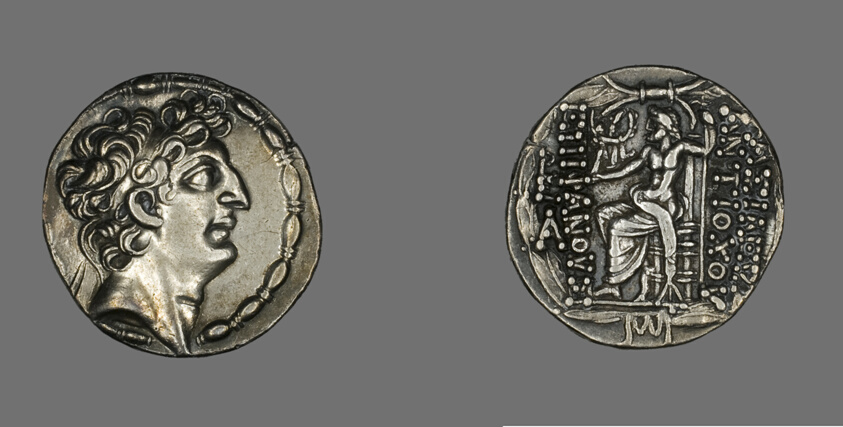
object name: Coin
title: Tetradrachm (Coin) Portraying Emperor Antiochos VIII Grypos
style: ptolemaic, greek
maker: Greek, minted in Syria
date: 104-96 BCE, reign of Antiochos VIII Grypos (121–96 BCE)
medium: Silver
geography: Syria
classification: coin; ancient art